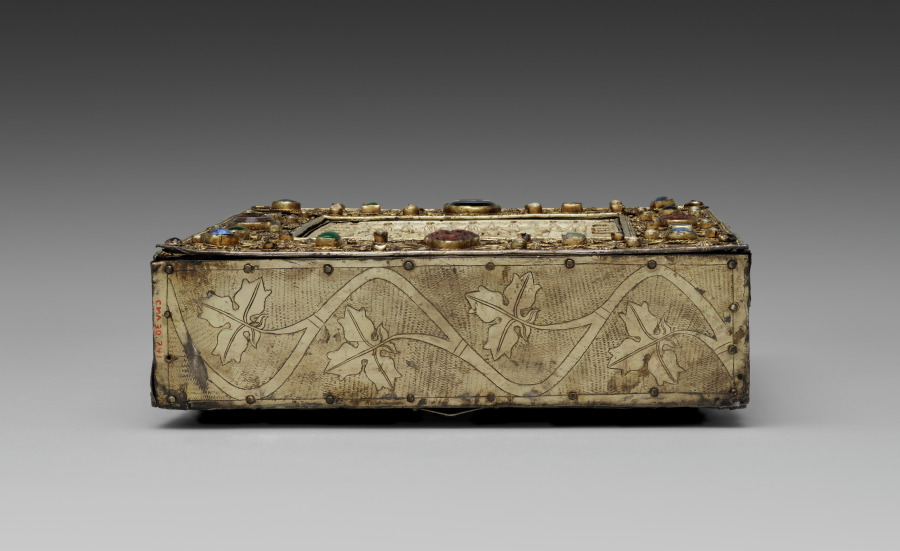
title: Book-Shaped Reliquary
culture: Ivory: Ottonian, Lorrain; Frame: Germany, Lower Saxony, Brunswick, Gothic period, 14th century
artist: circle of The Master of the Registrum Gregorii (German, active c. 972–1000)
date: c. 1000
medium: ivory, silver: gilded, pearls, rubies, emeralds, crystals, onyx, carnelian, oak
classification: Metalwork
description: This sumptuous object closely resembles a deluxe medieval book cover in both form and decoration. It was likely commissioned by Otto the Mild, Duke of Saxony (reigned 1318–48) around 1340. It was made to contain a leaf from each gospel and relics of the 11,000 virgins and 4 other saints. These relics were originally kept in a cavity behind the delicately carved ivory plaque depicting scenes from the Wedding at Cana (John 2:1–11). The story of Christ's first miracle is presented in three scenes. In the upper left, the Virgin informs Christ and his apostles of the lack of wine at the wedding banquet. On the right, the groom, his bride, and their guests sit behind a table, two servants offering them goblets. In the lower register, two attendants pour water into the first of six storage vessels while Christ addresses his mother and the bride. The back of the reliquary shows the engraved figures of the main patron saints of Brunswick Cathedral: placed within a delicate Gothic architectural frame, Saint John the Baptist is flanked by Saints Blaise and Thomas Becket.